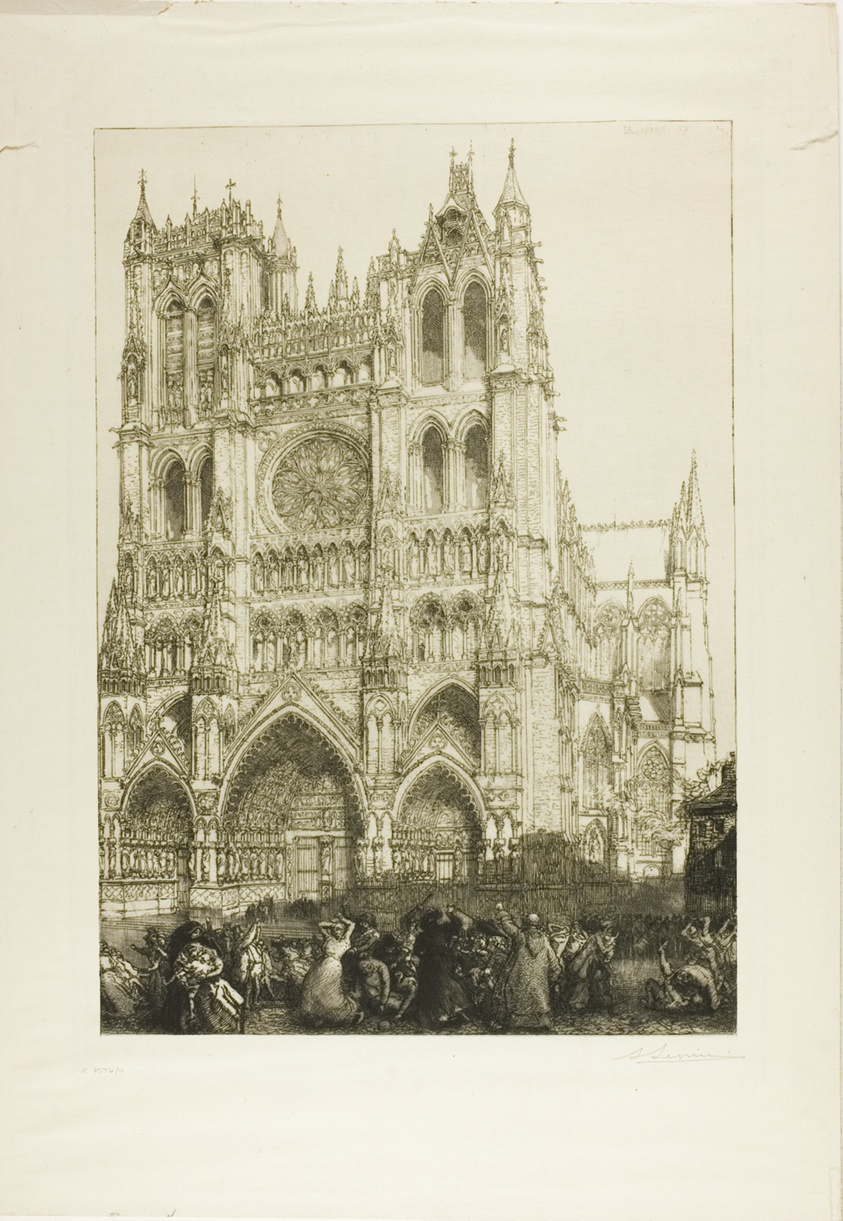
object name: Print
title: Amiens Cathedral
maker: Louis Auguste Lepère (French, 1849-1918)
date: 1907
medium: Etching on ivory Japanese paper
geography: France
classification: engraving; print; prints and drawing